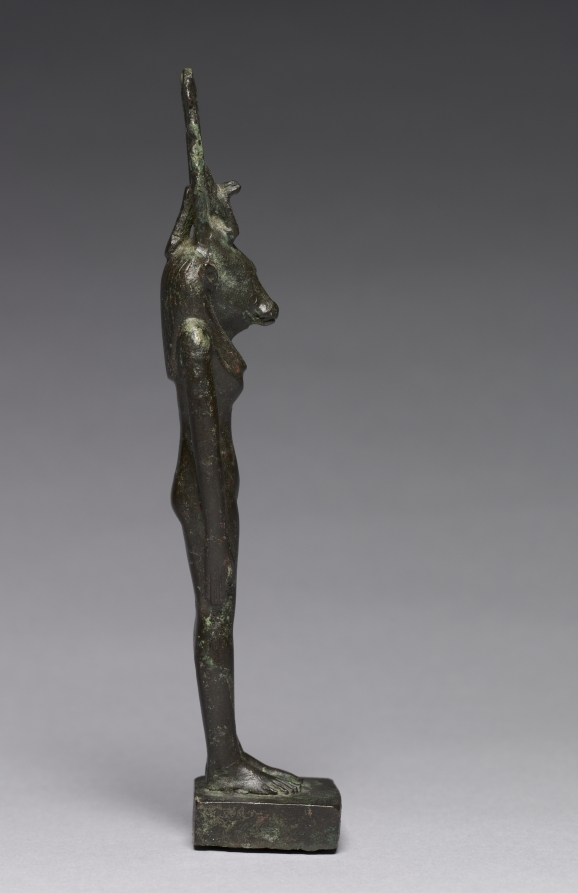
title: Statuette of Hathor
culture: Egypt, Late period (715–332 BCE), Dynasty 26 or later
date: 664–30 BCE OR 664–330 BCE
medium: bronze, solid cast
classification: Sculpture